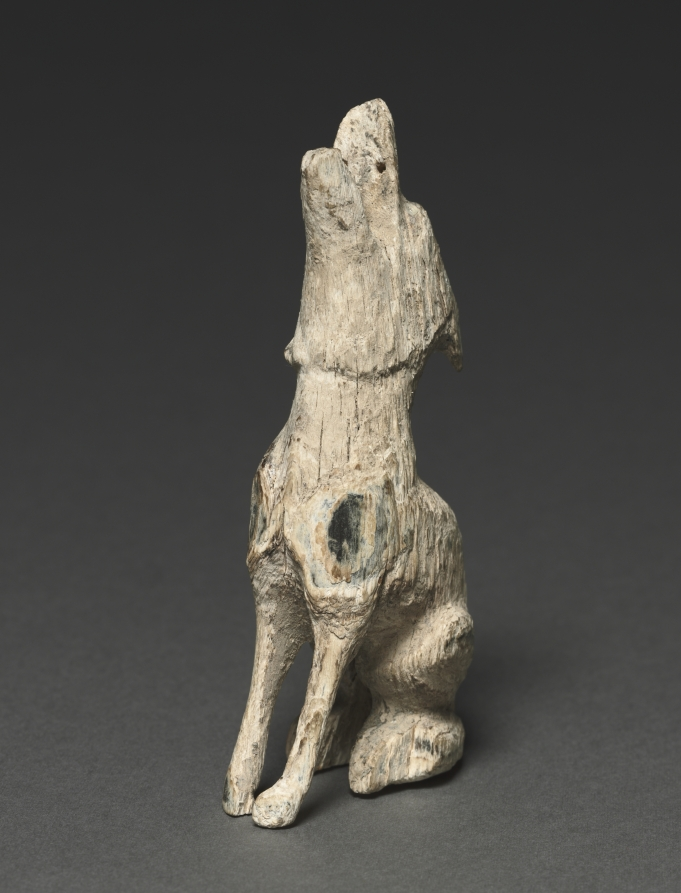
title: Howling Wolf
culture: Southern Siberia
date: c. 500–200 BCE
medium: wood with shell inlays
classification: Wood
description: Its subject, size, materials, and naturalistic style suggest that this small sculpture was made by one of the nomadic peoples of Western and Central Asia—perhaps the Scythians, who, with the Medes, conquered the Assyrians. Works of art made by the Scythians and other nomadic groups are shown on the northwest wall of this gallery.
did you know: The artist captured this wolf in mid-howl, depicting a wild animal in its natural element. The naturalistic carving of the wood depicts the animal's features, making it recognizable despite the eroded surface.